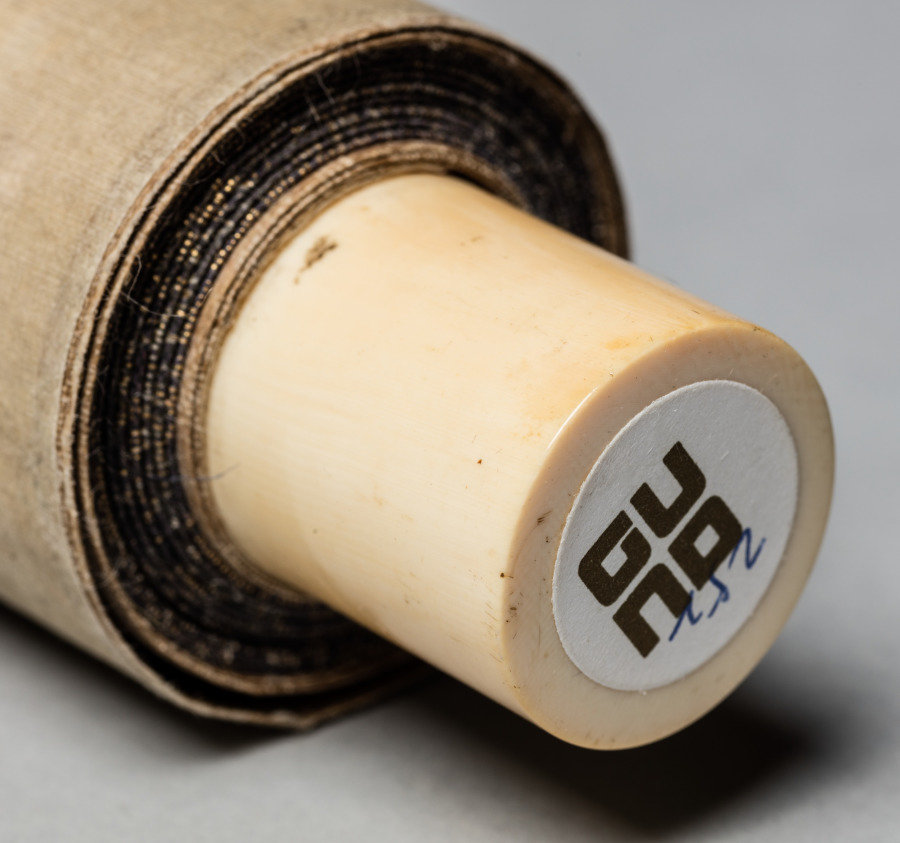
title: Su Dongpo Riding a Donkey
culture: Japan, Momoyama period (1573–1615)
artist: Reietsu (Japanese, active late 1500s to early 1600s)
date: late 1500s to early 1600s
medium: hanging scroll; ink on paper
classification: Painting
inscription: 落款 秀景 ？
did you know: Su Dongpo 蘇東坡 (1037–1101) was the leading Song dynasty poet and artist.